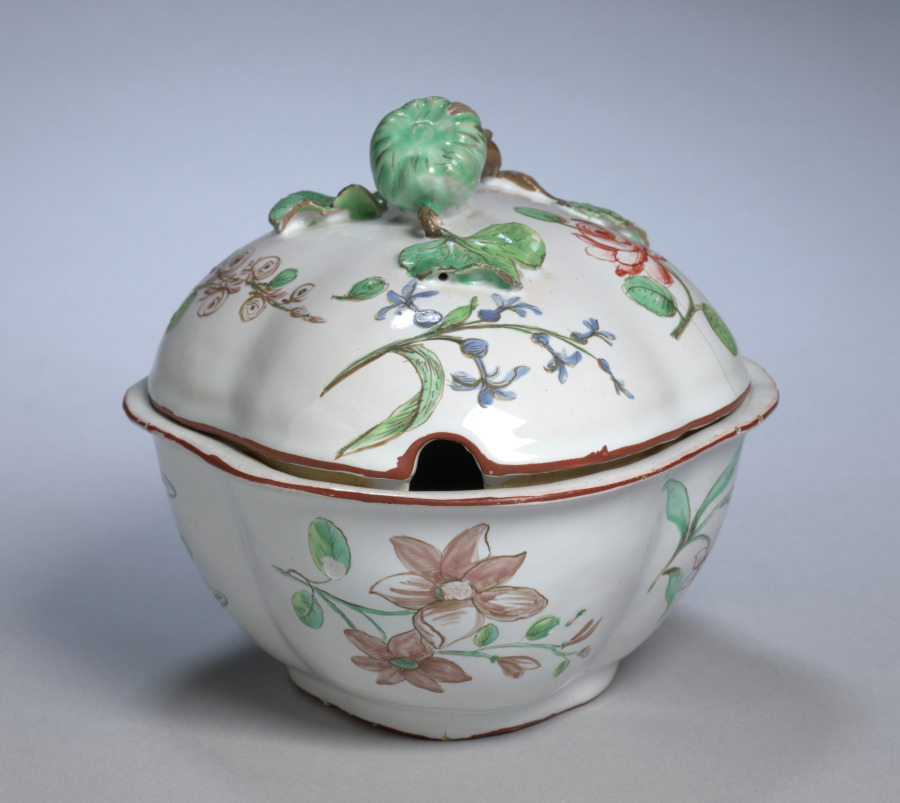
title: Sugar Basin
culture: France, 18th century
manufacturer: Sceaux Factory (French, active 1748–66)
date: c. 1750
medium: faience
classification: Ceramic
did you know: In medieval Italian churches, painted altarpieces served as a focal point for worshippers during the rituals of faith. The figures of Jesus, Mary, and eight saints are framed by a golden background that would have glistened in the flickering candlelight of the church.